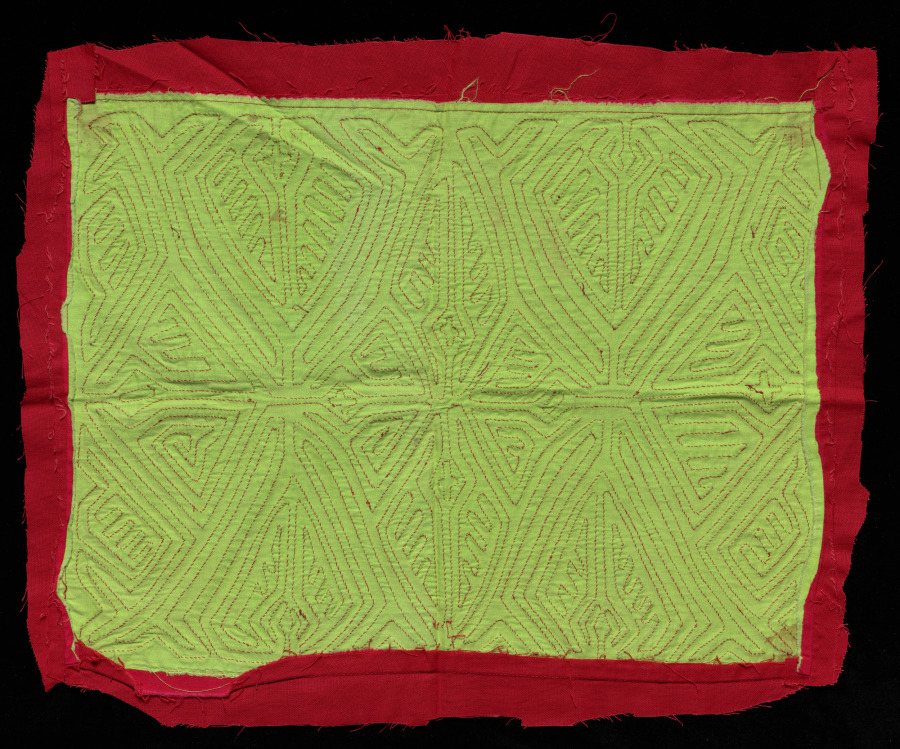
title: Labyrinth Mola Panel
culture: Republic of Panamá, Gunayala Comarca, Guna people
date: before 1960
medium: Cotton; reverse appliqué, appliqué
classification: Garment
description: This Labyrinth Mola Panel is executed in one of the most prestigious of Guna mola-making techniques. Known as bisu-bisu, it is a geometric maze of evenly spaced lines that create winding paths across the surface and visually dissolve the divide between figure and ground.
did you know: Panels like this one originally were sewn into blouses known as molas.